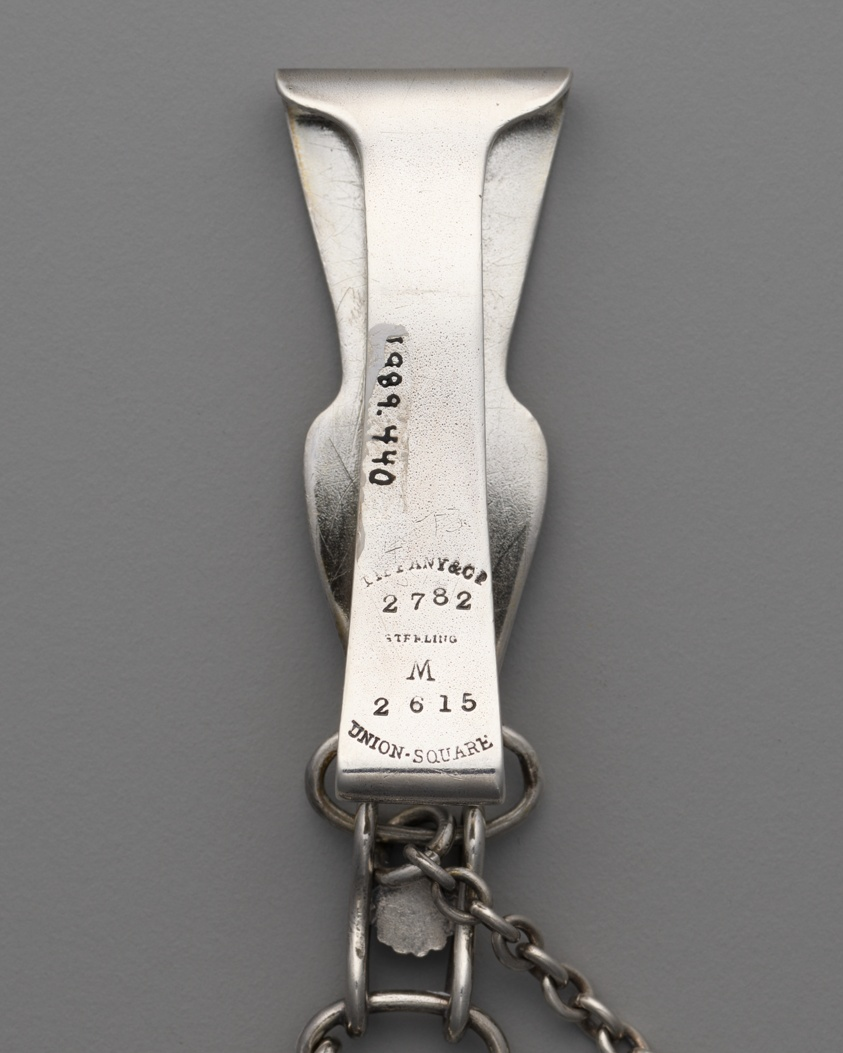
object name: Costume and Accessories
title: Chatelaine Hook and Chain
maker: Tiffany and Company (American, founded 1837); New York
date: 1870–74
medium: Silver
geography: New York City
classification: costume accessory worn at waist or below; chatelaine; silver; american decorative arts; american arts; decorative arts